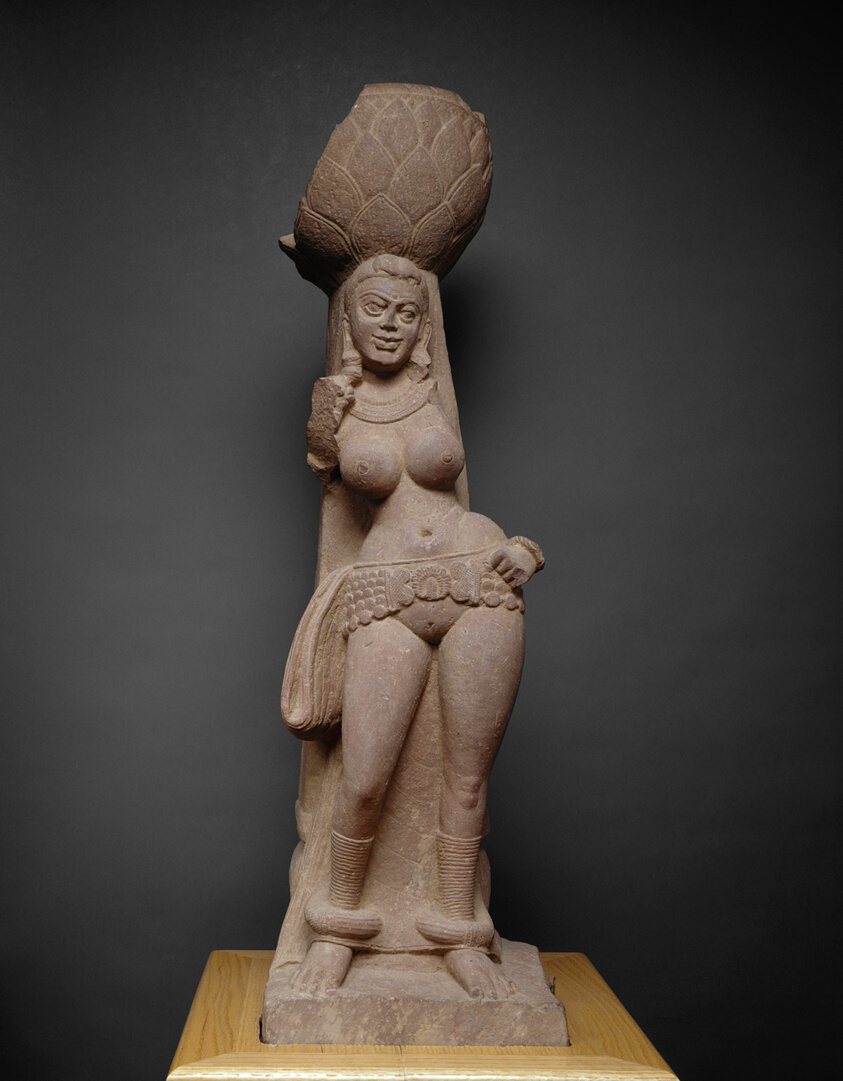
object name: Sculpture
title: Yakshi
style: South Asian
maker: India; Mathura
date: Kushan period, 2nd century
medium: Red sandstone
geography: Mathura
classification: sandstone; stone; sculpture; asian art